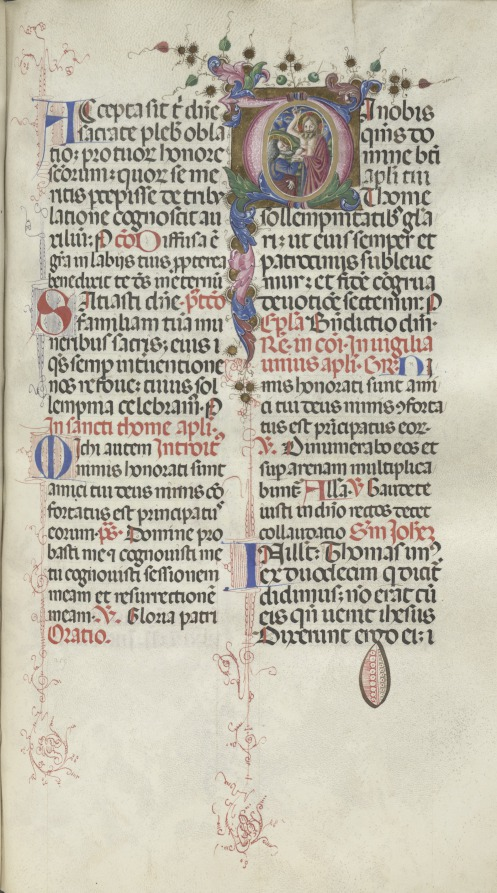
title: Missale: Fol. 262: Saint Thomas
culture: Italy, Perugia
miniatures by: Bartolommeo Caporali (Italian, c. 1420–1503)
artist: assisted by Giapeco Caporali (Italian, d. 1478)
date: 1469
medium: ink, tempera and burnished gold on vellum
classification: Bound Volume